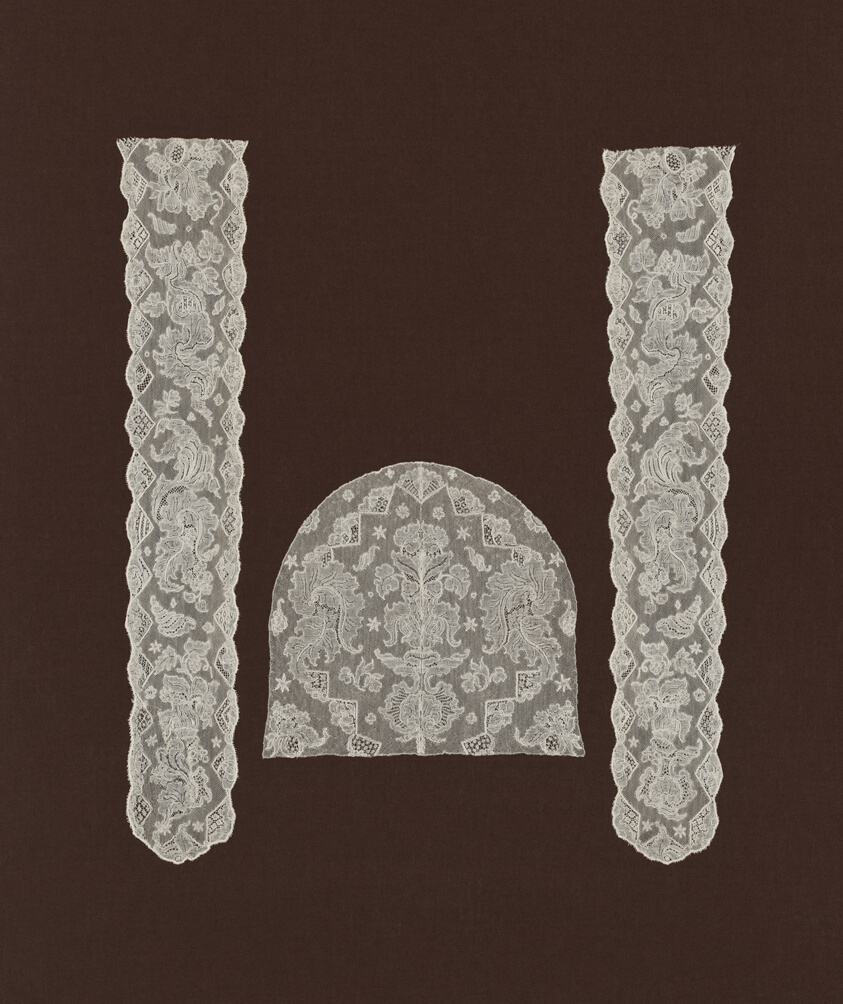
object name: Costume and Accessories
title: Cap Crown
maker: Belgium, Flanders, Mechlin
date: 1740s/50s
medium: Linen, bobbin straight lace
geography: Flanders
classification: costume accessory; lace - bobbin; lace; textile; costume; costume accessory - headdress; costume accessory worn above the waist